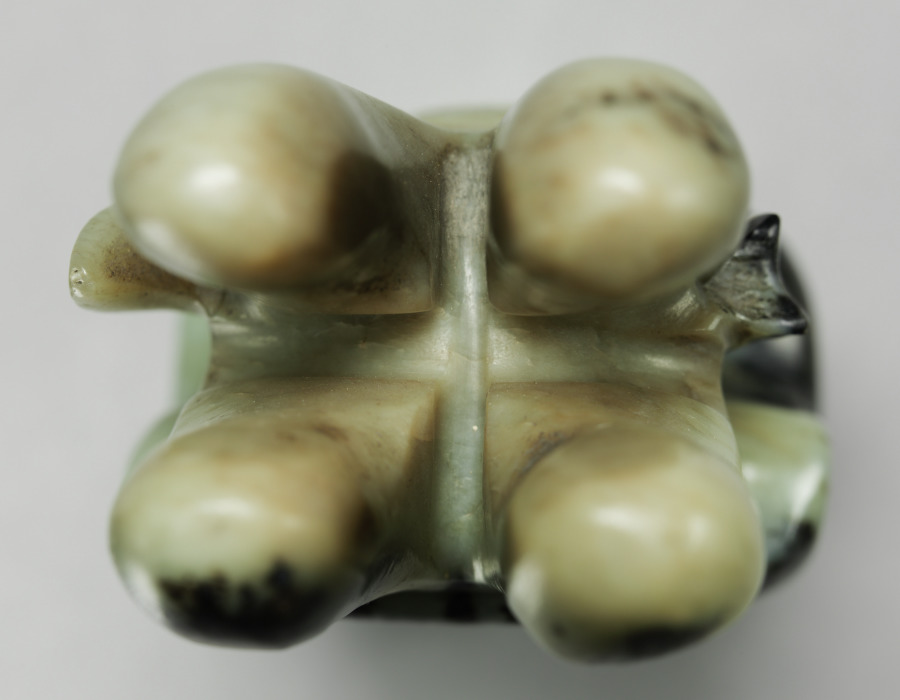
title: Amulet in the Form of a Seated Figure with Bovine Head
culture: Northeast China, Neolithic period, probably Hongshan culture (4700–2920 BCE)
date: c. 4700–2920 BCE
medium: jade (nephrite)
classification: Jade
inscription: There are two paper labels on the back of the jade pendant: one partial label with Chinese characters and one with the typed number "150".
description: With a bovine head and four horns, this seated figurine was a powerful ritual and shamanic symbol. Drill holes above its shoulders form two interconnected perforations for suspension, suggesting that the jade was originally used as a pendant, presumably by the shaman performing the tasks of journeying to and communicating with the supernatural realms.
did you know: CMA daringly acquired this masterpiece without knowing exactly what it was. Only after Chinese archaeologists started excavating similar jades in Northeast China could it be attributed to the Hongshan culture.